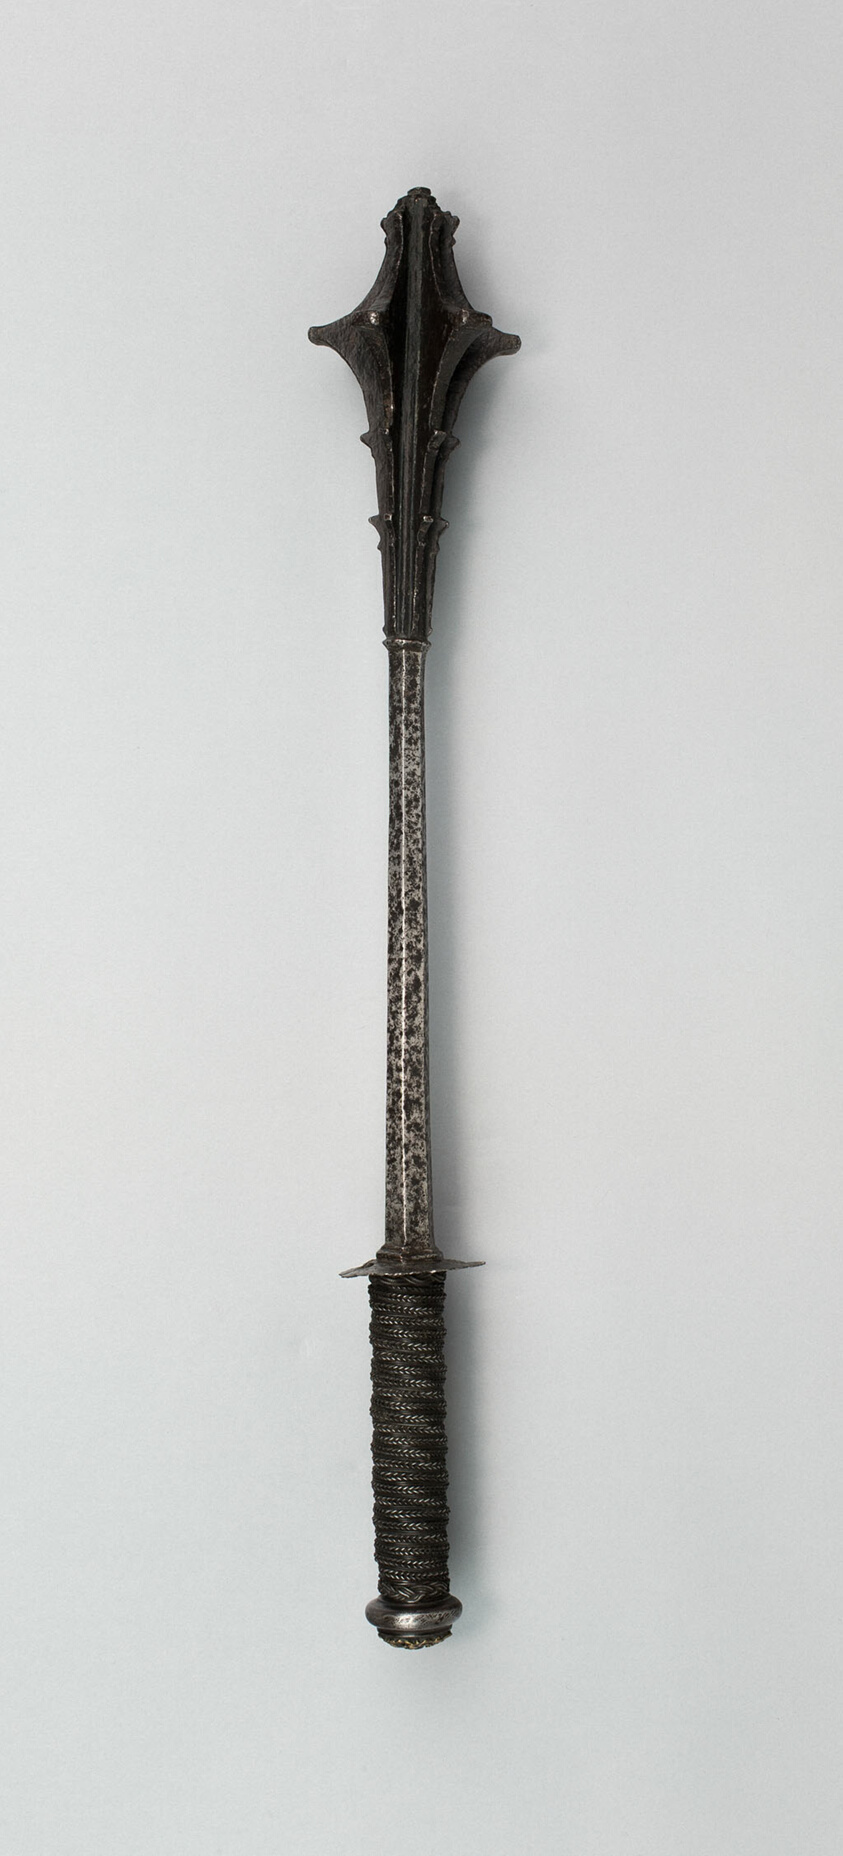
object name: Arms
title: Mace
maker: German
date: 1470/1500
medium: Iron and brass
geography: Germany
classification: shafted weapon; arms; arms and armor